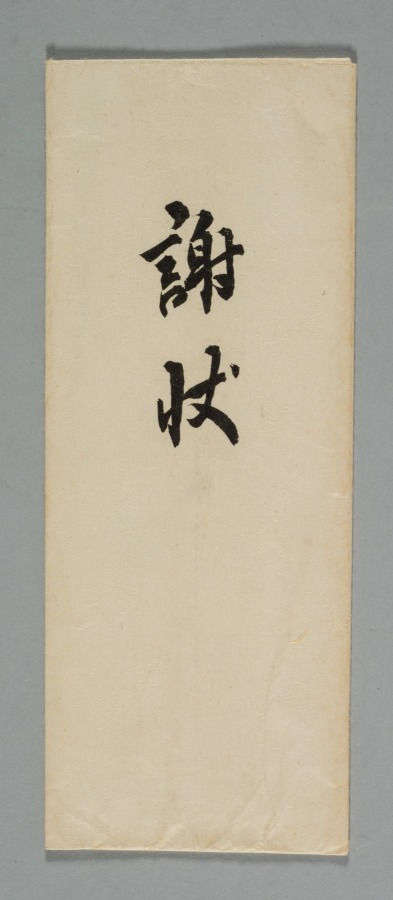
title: Mountain View and Blue Water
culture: Japan, Edo period (1615–1868)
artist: Tanomura Chikuden (Japanese, 1777–1835)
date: early 1800s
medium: hanging scroll; ink, color, and gold on paper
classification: Painting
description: Tanomura Chikuden was an eminent painter whose adopted son, Tanomura Chokunyū (1814–1907), was Seifū Yohei III’s painting teacher. This work was displayed at a gathering commemorating the 10th anniversary of Chokunyū’s death, something we know only because its custom-made box and archival documents have been carefully kept together. The box inscription also confirms that Chikuden was emulating the style of the Mi family of painters, active during China’s Southern Song dynasty (1127–1279). The painting’s Chinese-style silk wrapper is inscribed and sealed on its interior by members of Chokunyū’s community.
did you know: The mountain shapes are built up with multiple small wet strokes.